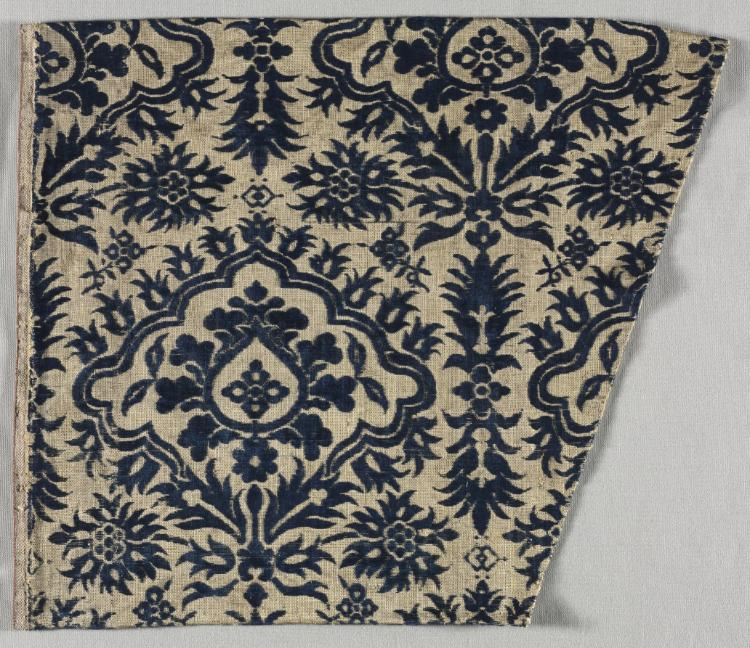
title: Velvet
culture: China, 17th century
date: 1600s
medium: velvet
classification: Velvet